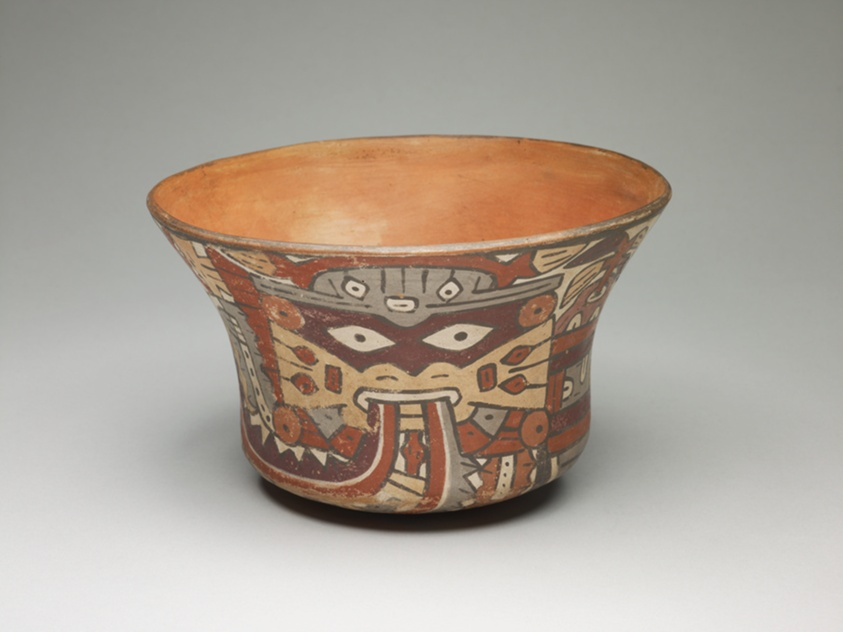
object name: Vessel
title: Small Bowl Depicting Costumed Ritual Performer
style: nazca, early intermediate period, Pre-Columbian, americas, Arts of the Americas, andean, andes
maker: Nazca; South coast, Peru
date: 180 BCE–500 CE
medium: Ceramic and pigment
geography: Peru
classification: bowl; earthenware; art of the americas; ceramics; vessel